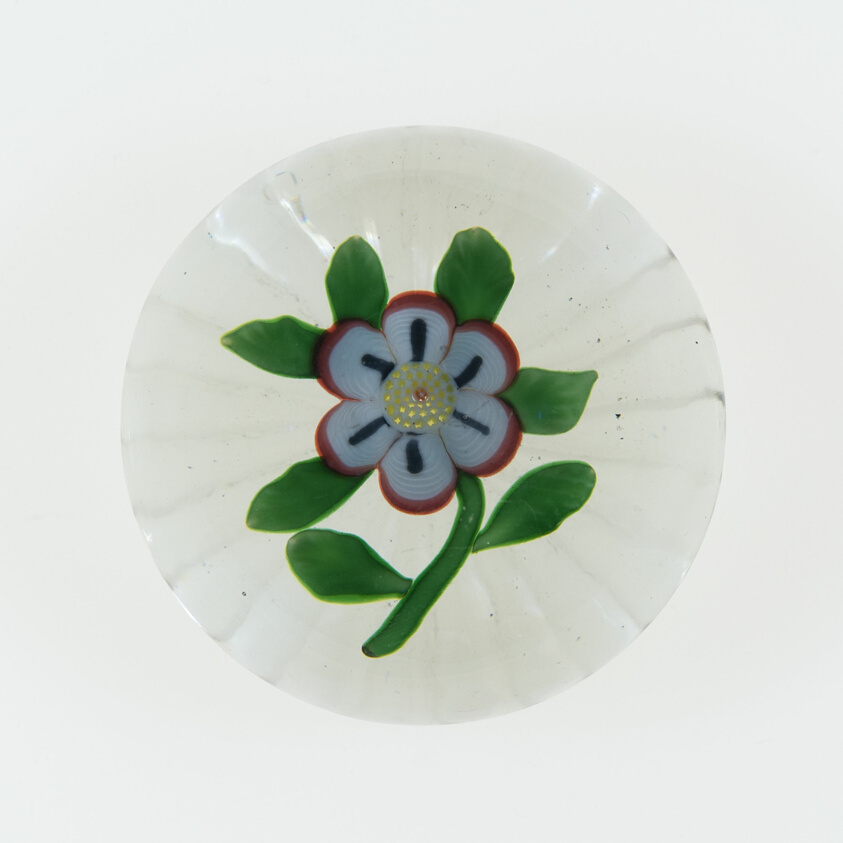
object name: Glass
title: Paperweight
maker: Baccarat Glassworks (Cristalleries de Baccarat); Lorraine, France, founded 1764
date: c. 1845–60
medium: Glass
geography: Baccarat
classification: paperweight; glass